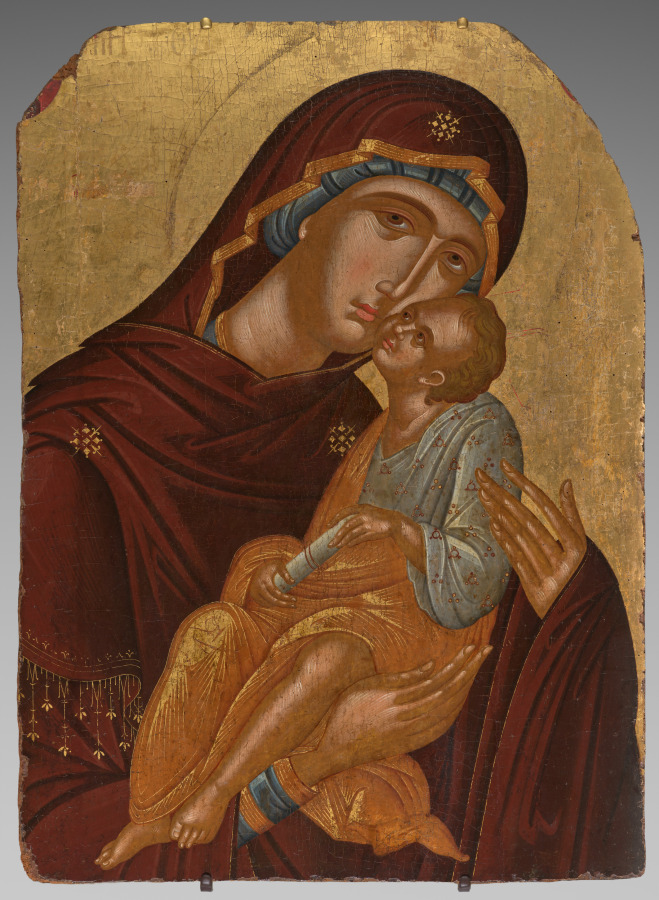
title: Icon of the Mother of God and Infant Christ (Virgin Eleousa)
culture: Republic of Venice, Kingdom of Candia, Candia (Heraklion, Crete, Greece) or Byzantine Empire, Constantinople (Istanbul, Turkey)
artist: attributed to Angelos Akotantos (Cretan, died 1450)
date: c. 1425–50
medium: tempera and gold on wood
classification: Painting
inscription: None visible on obverse; unidentified inscriptions on reverse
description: This large icon of a tender embrace between the Virgin Mary and Christ likely hung on a Greek Orthodox church’s iconostasis, a screen separating the congregation from the altar-containing sanctuary, which only clergy could enter. A skilled painter of faces and draperies, Angelos Akotantos was among Crete’s most sought-after artists. Based in Byzantium’s artistic center in his hometown of Candia, he painted for imperial clients and beyond. Despite theological differences, Cretan icons of Mary were popular in Ethiopia. In the early 1500s, Emperor Lebna Dengel sent monks Zekre and Pawli to acquire Cretan icons for him. Twenty-nine Cretan icons are still venerated (honored) in Ethiopian churches.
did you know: This is the only known work by Angelos Akotantos in the United States.